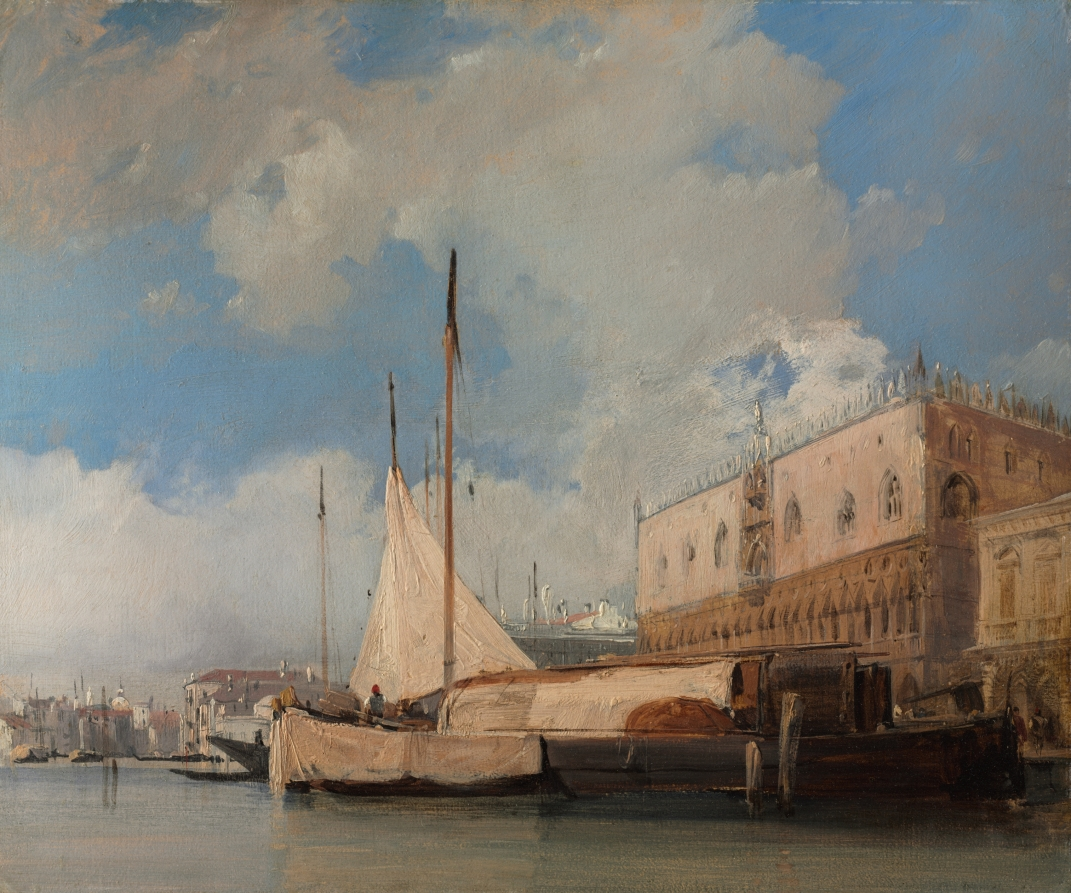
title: The Doge's Palace, Venice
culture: England, 19th century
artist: Richard Parkes Bonington (British, 1802–1828)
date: 1826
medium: oil on millboard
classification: Painting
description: At the age of 22, Bonington achieved overnight success at the official (state sponsored) Paris exhibition known as Salon. Two years later, in 1826, he journeyed to Venice, a city that had long attracted landscape artists. At first, constant rain greatly depressed Bonington, but suddenly the weather changed and Venice was at its glorious best. Bonington frequently painted outdoors, capturing immediate impressions of Venetian architecture and sunlight. He made this particular study from a boat anchored in the lagoon near the Doge's Palace. The thick swirls of paint, with colors mixed together while still wet, indicates how rapidly the artist worked.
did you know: At age seventeen, Bonington began teaching precision drawing at the École des Beaux Arts in Paris and he was essential to bringing aspects of the English style to France.